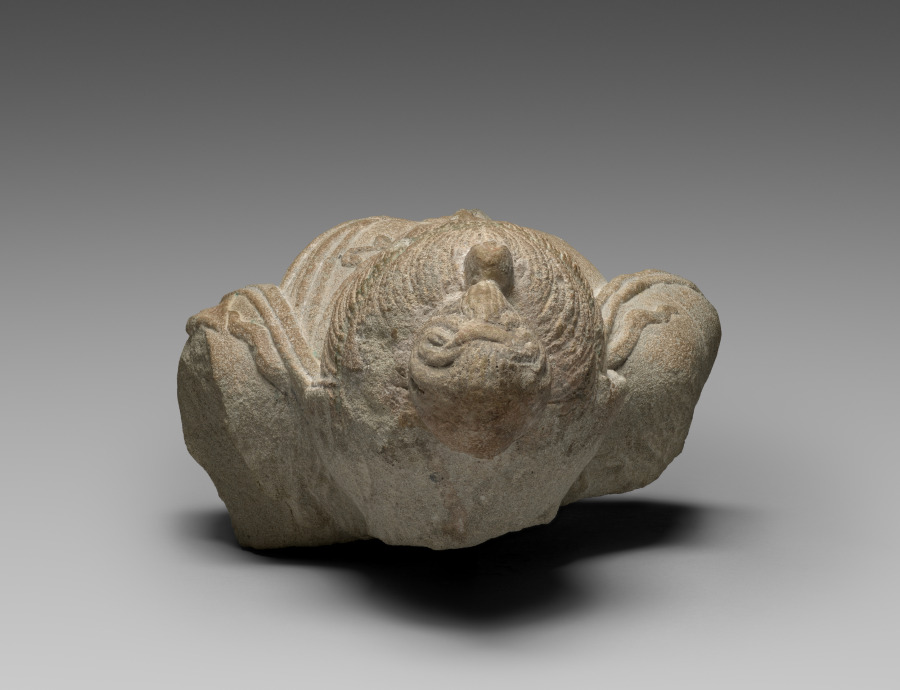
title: Bodhisattva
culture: China, Shanxi province, Taiyuan, Tianlongshan caves, Cave 6, Tang dynasty (618-907)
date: early 700s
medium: light gray limestone with traces of polychromy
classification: Sculpture